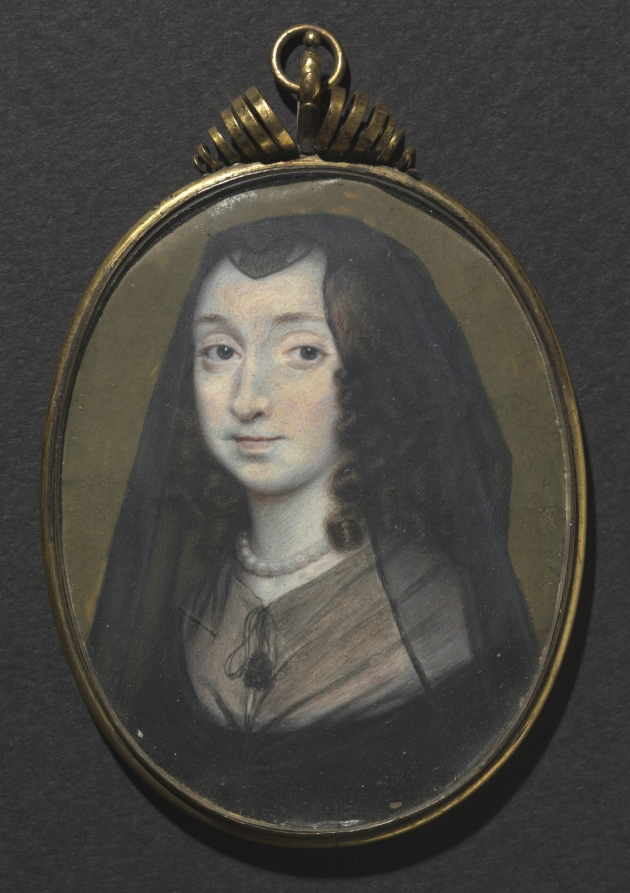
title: Portrait of Elizabeth Morrison, Lady Capell of Hadham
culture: England, 17th century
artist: Richard Gibson (British, c. 1615–1690)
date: c. 1650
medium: watercolor on vellum in a silver gilt frame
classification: Portrait Miniature